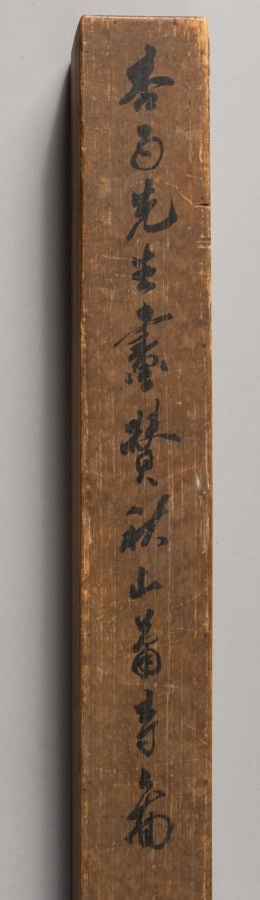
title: Sunset over Autumn Mountains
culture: Japan, Edo period (1615–1868)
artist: Hoashi Kyōu (Japanese, 1810–1884)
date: 1869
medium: hanging scroll; ink and light color on silk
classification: Painting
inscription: translation of poem [by Nora Liu]: The way was forgotten while enjoying the conversation and colors of Autumn, The road entered among the red trees and the white clouds, The trace of a path led to the lonely temple where the monks received enlightenment, The sound of chimes echo remotely in the mountains where the sunset falls. In the year 1869, Kyou